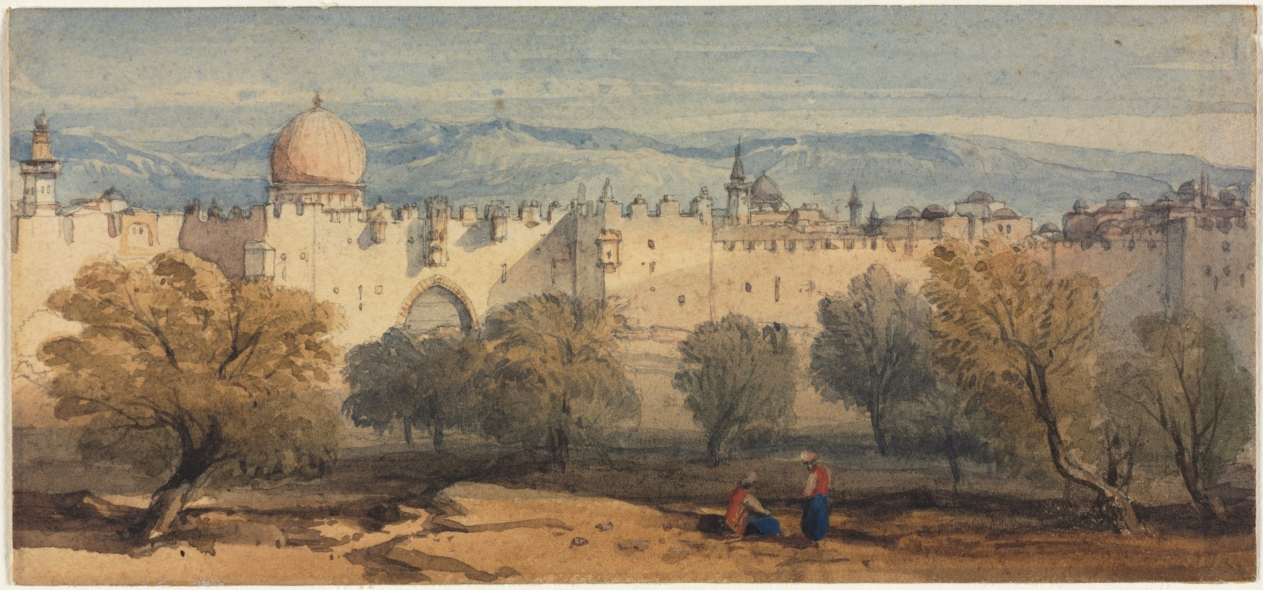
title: St. Stephen's Gate, Jerusalem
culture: England, 19th century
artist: Richard Principal Leitch (British, 1844–1865)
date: c. 1860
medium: watercolor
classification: Drawing